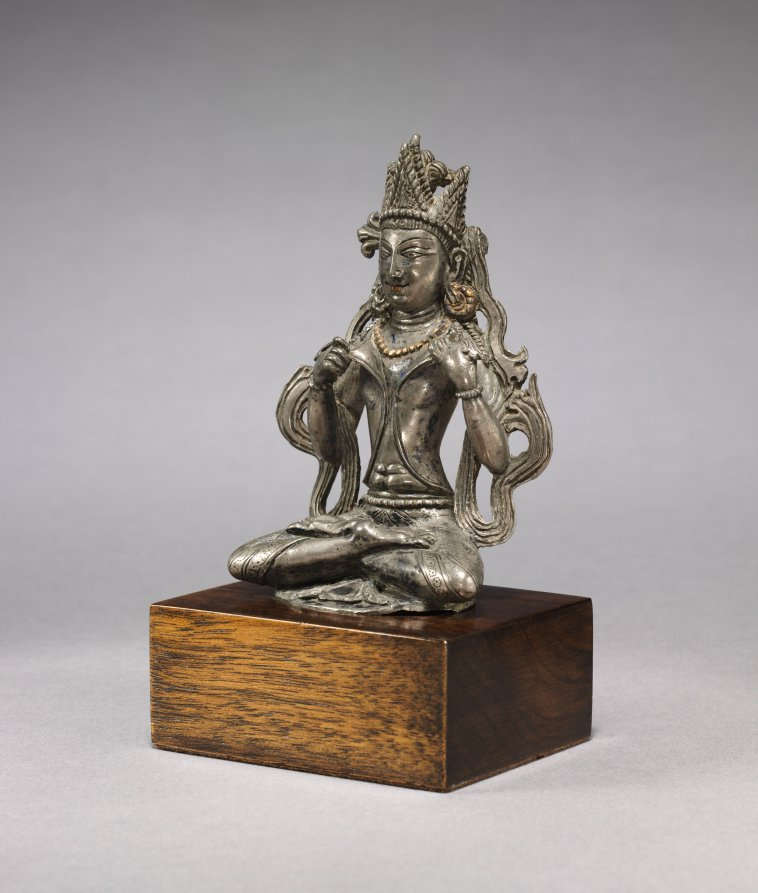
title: Bodhisattva Vajraraksha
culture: Western Tibet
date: c. 900s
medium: silver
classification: Sculpture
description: Once part of a set of sculptures depicting the enlightened beings who occupy a perfect world called the Diamond Realm (Vajradhatu), this figure holds the collar of his jacket in a gesture specific to him. An important practice in Tibetan Buddhism is the visualization of the Diamond Realm as described in texts and aided by artistic representations called mandalas. Bodhisattva Vajraraksha sits in the northern quadrant as a subsidiary figure to the Buddha Amoghasiddhi, who is green in color and quells fear.